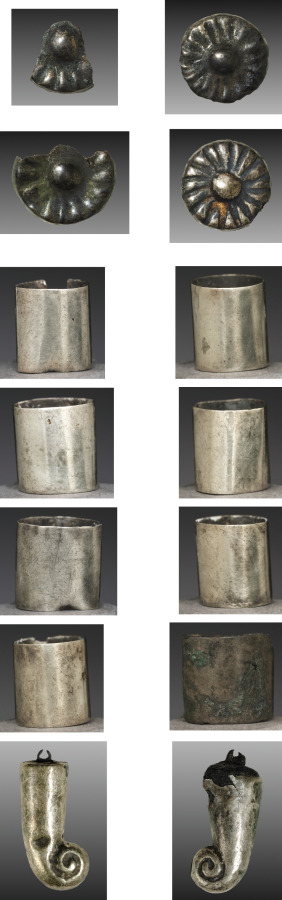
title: Sidelocks and Elements of Wig Decoration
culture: Egypt, Middle Kingdom (2040–1648 BCE), Dynasty 12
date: 1980–1801 BCE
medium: Electrum (?) over a calcite gesso; silver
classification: Jewelry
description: Elite Egyptian people once elaborately styled their hair or wore costly wigs to show their status. To further beautify their locks, women and men alike wove or sewed ornaments into their wigs or onto textiles draped over them. While most historical Egyptian wigs disintegrated over centuries, sculptures and friezes show how people wore these shining ornaments. Made from silver, curved sidelock pendants attached to braid ends or dangled on the forehead. Also of silver, tubes slid over braids or sectioned hair. Floral rosettes could have been sewn throughout, adding visual interest and reflecting the light with their faceted surfaces. While acquired together, these ornaments weren’t necessarily part of a set.